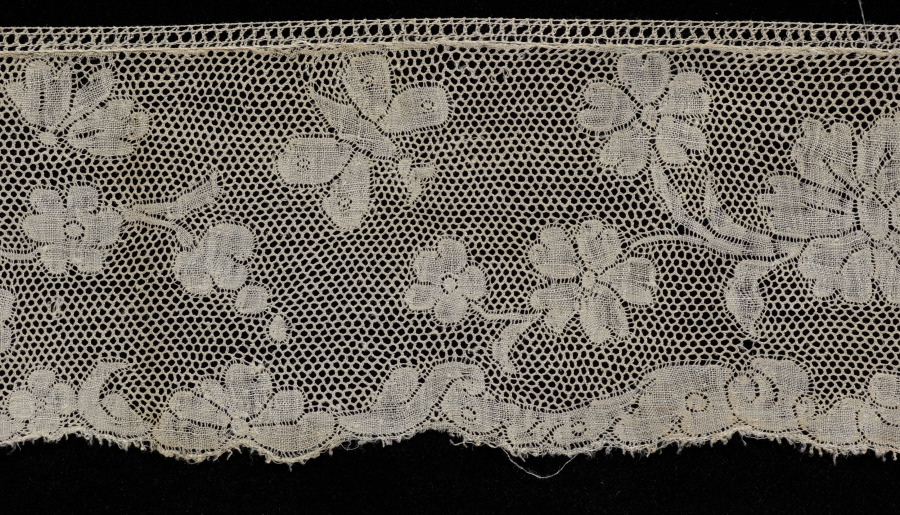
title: Lace Edging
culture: France, Valenciennes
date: 1700s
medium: Bobbin lace (Valenciennes)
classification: Lace